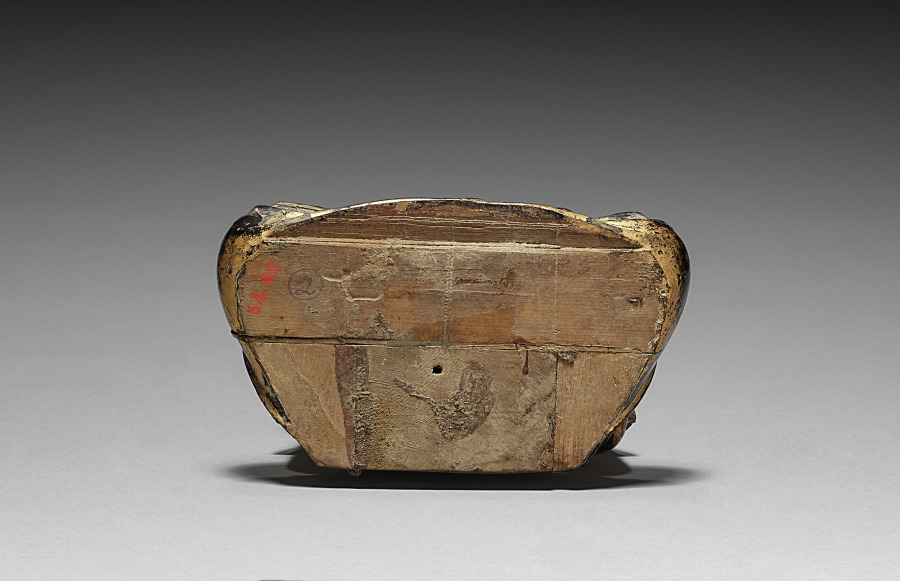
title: Bodhisattva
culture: Japan, Heian period (794–1185)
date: 900s-1100s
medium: gilded wood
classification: Sculpture